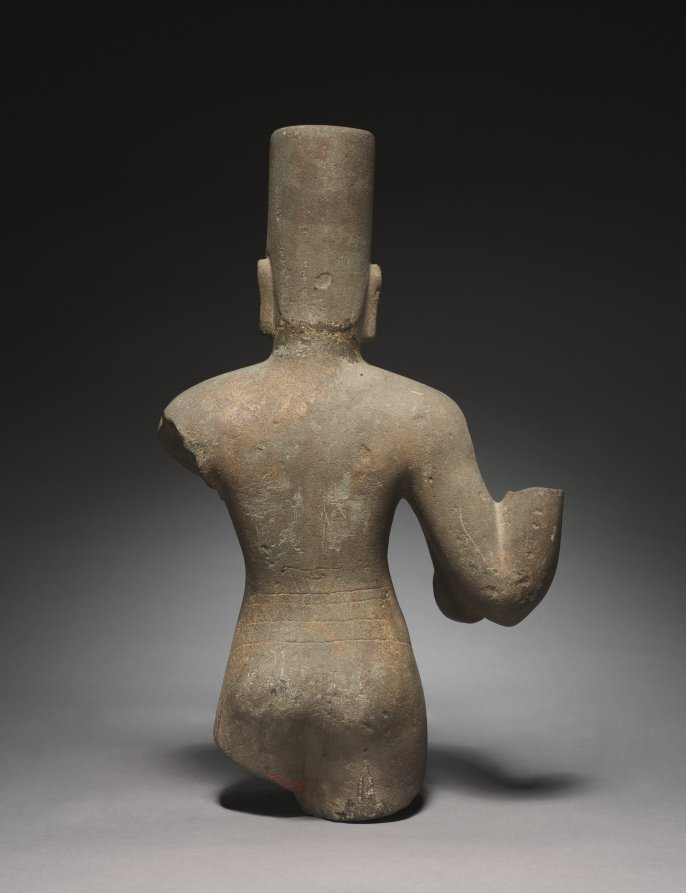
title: Vishnu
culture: Cambodia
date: 650–700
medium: sandstone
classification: Sculpture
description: Vishnu has the features of royalty, indicated by the high mitre-like crown with the flat top, distinctive to types made at the site of Prasat Andet. His status as a god, greater than any earthly king, is indicated by the four arms, traces of which are still visible. The sensitive rendering of the eyes and slight smile are characteristics of Cambodian sculpture, and during this early period, the form of the body reveals some relatively naturalistic musculature and treatment of the garments. He wears the Southeast Asian lower garment called sampot, around which his upper garment is loosely tied. It is Vishnu who incarnates himself into the world in avatars, including Krishna and the boar Varaha. Here we see his iconic form as Vishnu himself.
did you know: The deity is four-armed with the arms running parallel from the shoulders and then bifurcating at the elbows.